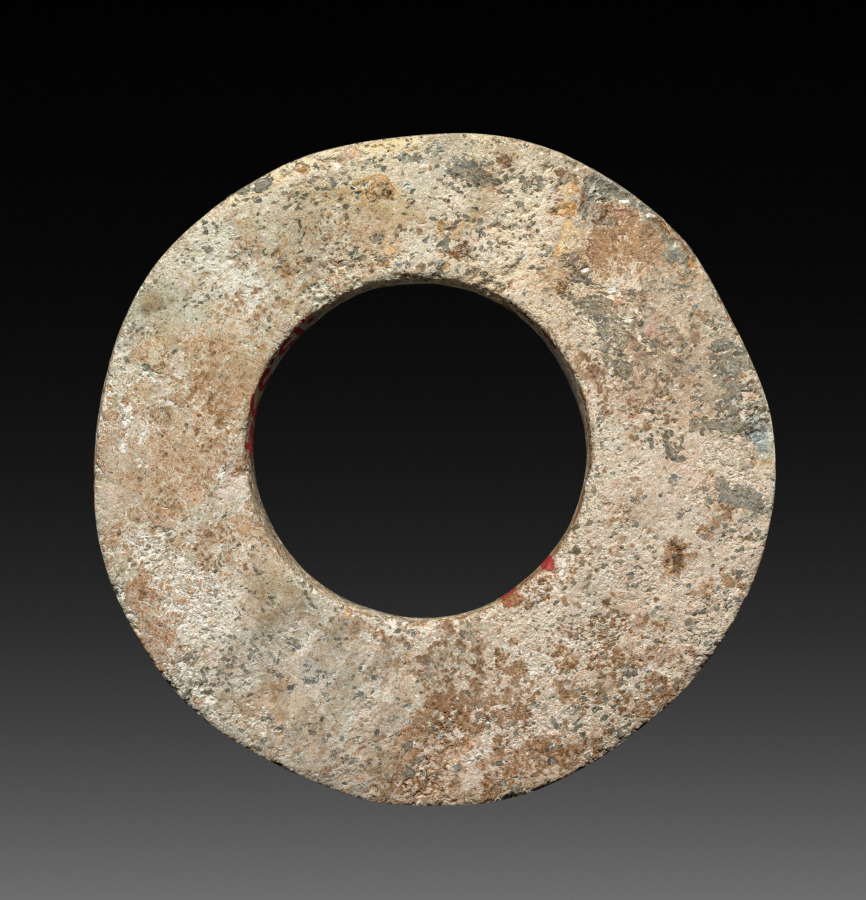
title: Ring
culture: China, Han dynasty (202 BCE–220 CE) or later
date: 200 CE or later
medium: stone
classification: Jade